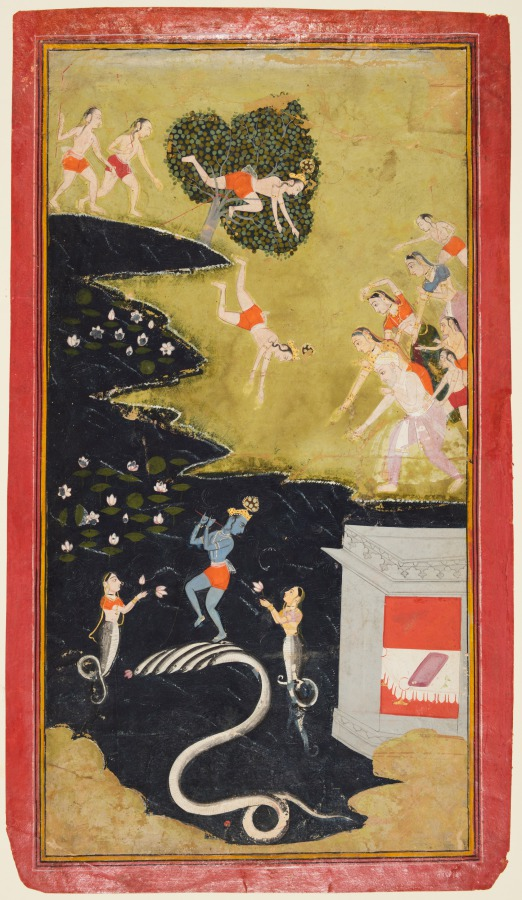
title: Krishna Quells the Serpent Kaliya, from a Bhagavata Purana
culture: Northwestern India, Rajasthan, Rajput Kingdom of Mewar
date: c. 1710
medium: gum tempera and gold on paper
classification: Painting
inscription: pānā 29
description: In the forest where Krishna lived as a youth among the cowherds, there was a great pool of water connected to the Yamuna River. The water had become toxic from the poison excreted by all the snakes living there, including the serpent Kaliya. Kaliya’s royal residence is depicted at the lower right. In order to make the pool usable for drinking and bathing, Krishna tamed the serpent king by dancing on his heads. Krishna then persuaded him to move away to the ocean.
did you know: The snake-demon Kaliya holds a flower in his mouth for Krishna.